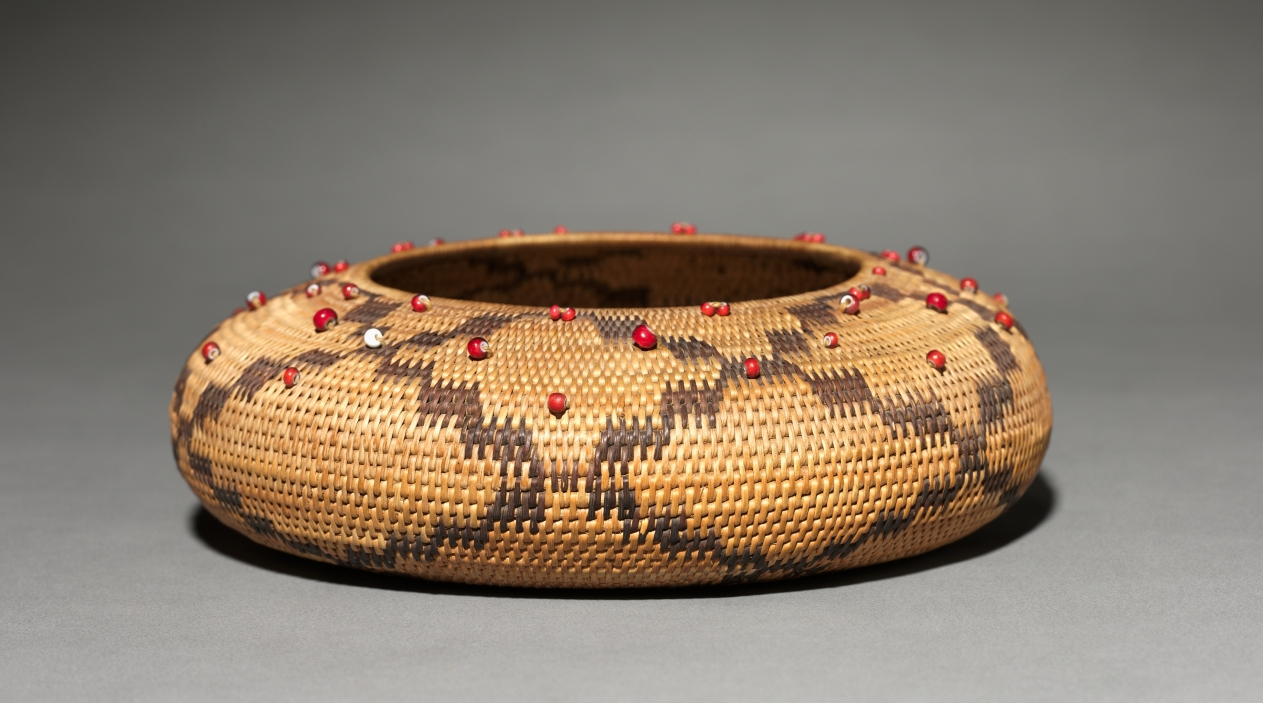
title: Trinket Bowl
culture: California, Pomo, Late 19th- Early 20th century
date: c. 1895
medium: Bulrush, Sedge, with beads; coiled (1 rod)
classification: Basketry